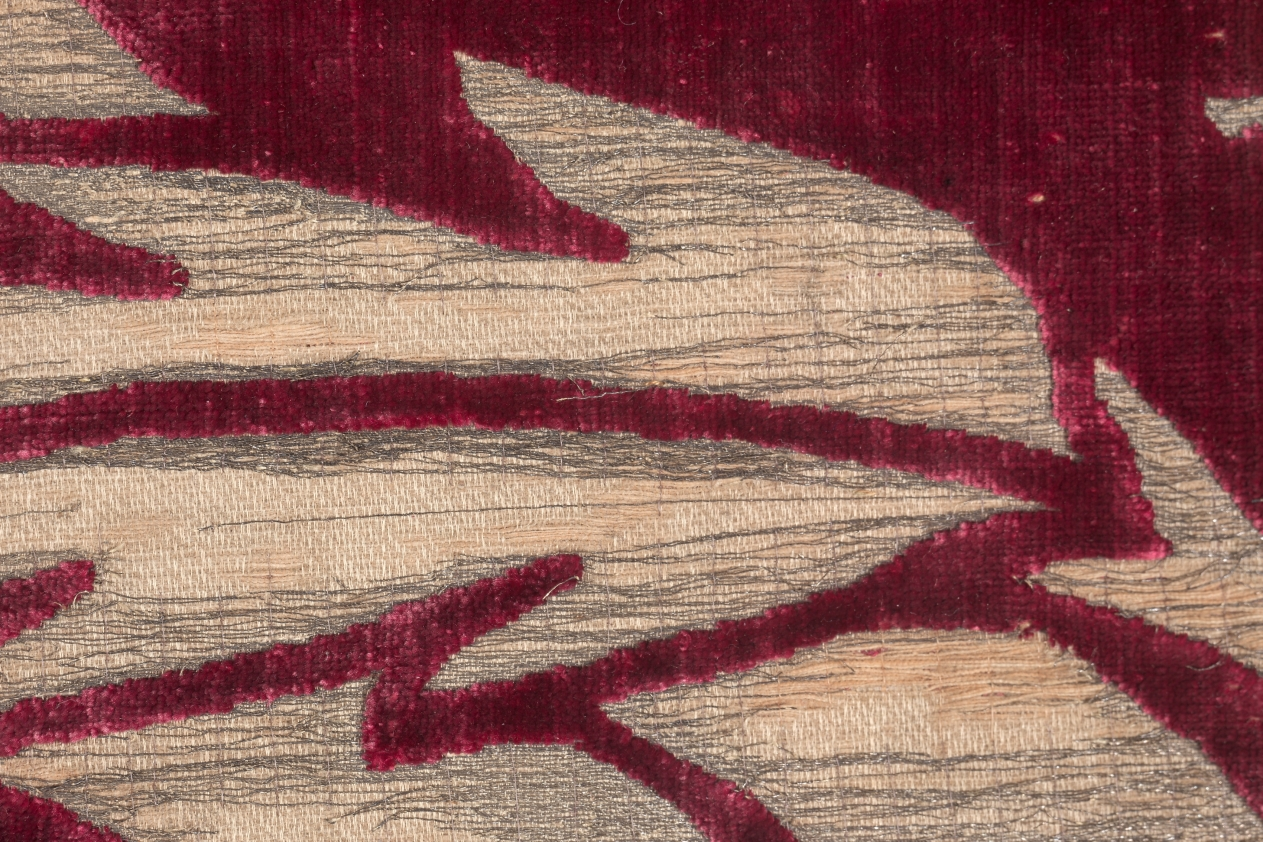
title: Brocaded Velvet Panel with Italianate Pattern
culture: Turkey, Istanbul or Bursa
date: 1575–1625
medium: Silk: velvet, brocaded; gilt-metal thread and cotton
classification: Velvet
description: Rarely are four fabric widths preserved together from any culture. This gilt-metal thread pattern combines Turkish and Italian features: the large ogival (curved) lattice clasped by crowns and the velvet structure are Turkish, and the two so-called artichoke designs are enlarged adaptations of Italian motifs. A symbol of wealth and power, this velvet panel was woven during the artistic height of the Ottoman Empire in the late 1500s. It may have covered a divan (sofa) or possibly enhanced a wall during cold winters in the imperial Topkapi Palace in Istanbul.